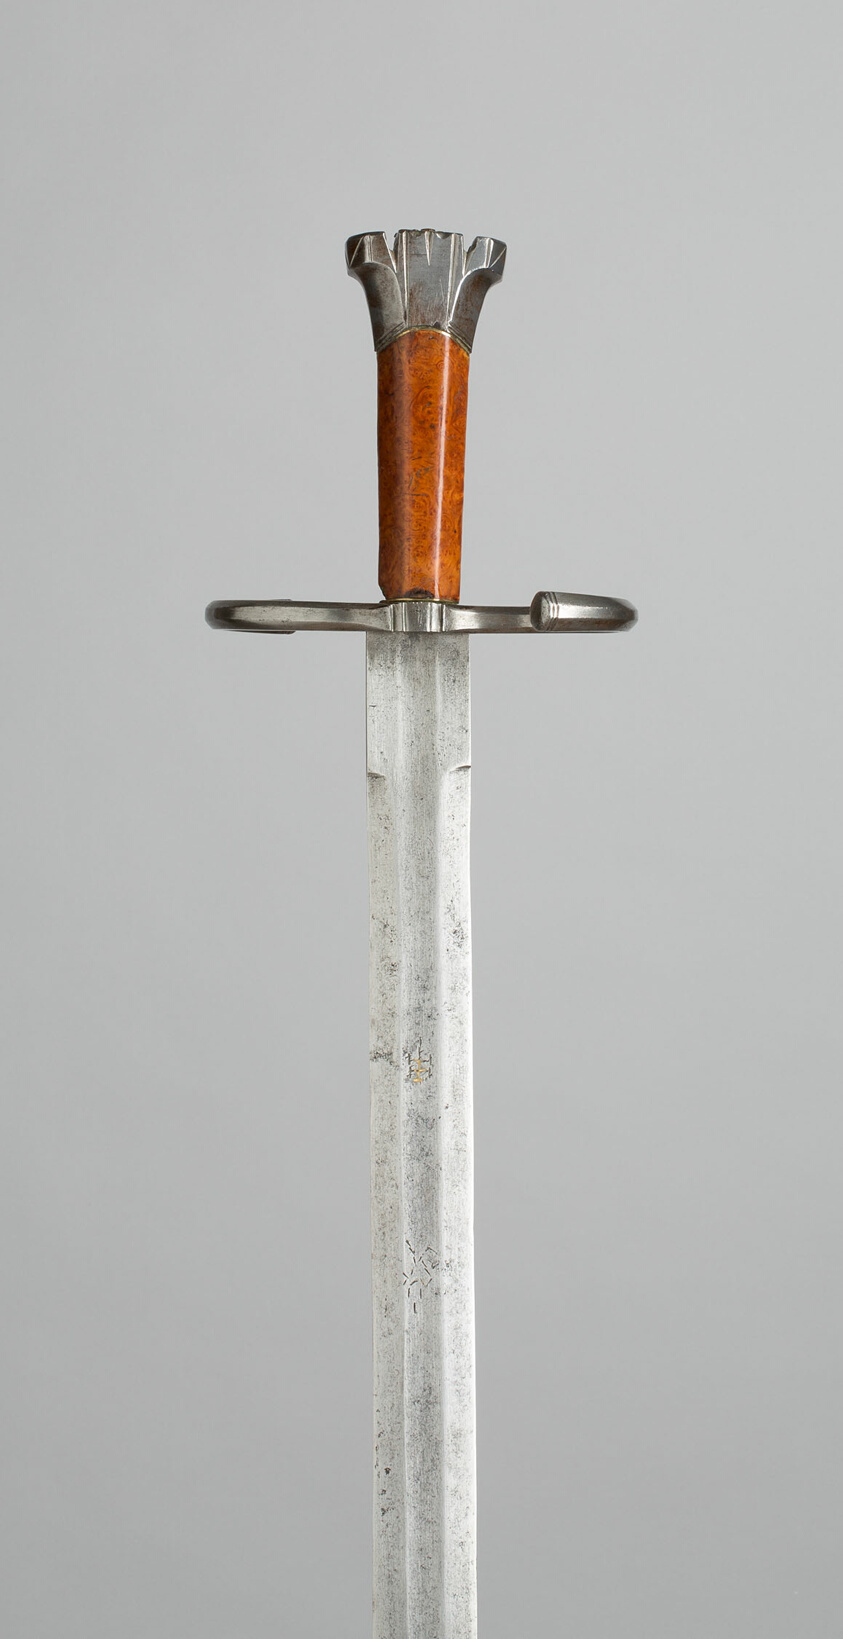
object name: Arms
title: Katzbalger (Infantry Sword)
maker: Swiss or German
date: 1500/15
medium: Steel, brass, and walnut burl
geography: Switzerland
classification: edged weapon-sword; arms; arms and armor